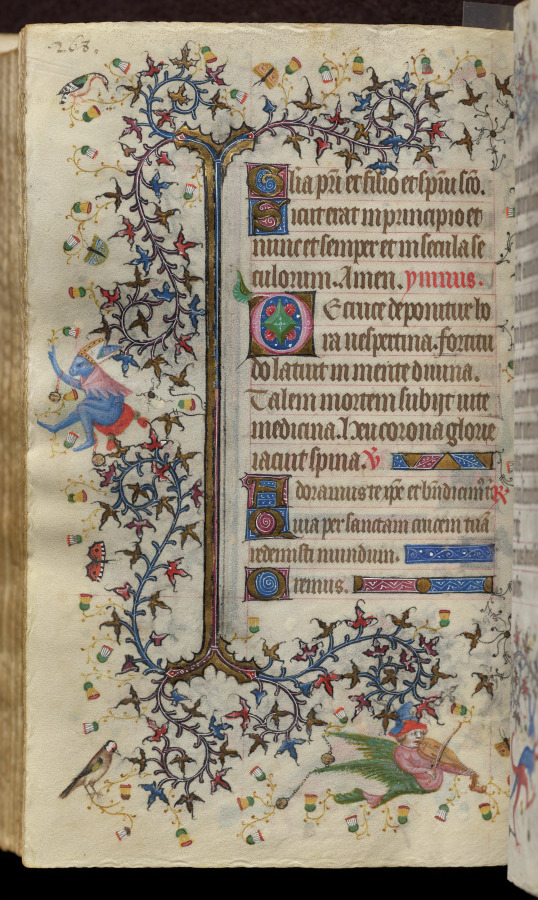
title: Hours of Charles the Noble, King of Navarre (1361-1425): fol. 134v, Text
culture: France, Paris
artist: Master of the Brussels Initials and Associates (French)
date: c. 1405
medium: ink, tempera, and gold on vellum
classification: Bound Volume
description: This precious volume was obviously highly prized by its owner, the French-born King of Navarre, who had his coat of arms painted on no less than twenty folios. Rather than directly commissioning this manuscript from a specific workshop, it seems that Charles the Noble acquired his book of hours -- perhaps ready-made for the luxury market -- while on a trip to Paris in 1404-05. A collaborative effort, six painting styles are evidenced within the pages of this codex, those of two Italians, two Frenchmen, and two Netherlanders. The painter who was responsible for the planning and decoration of the book, and who produced seventeen of the large miniatures, was a Bolognese artist known as the Master of the Brussels Initials. His principal assistant, responsible for most of the borders, was a Florentine who signed his name "Zecho" da Firenze on folio 208 verso.